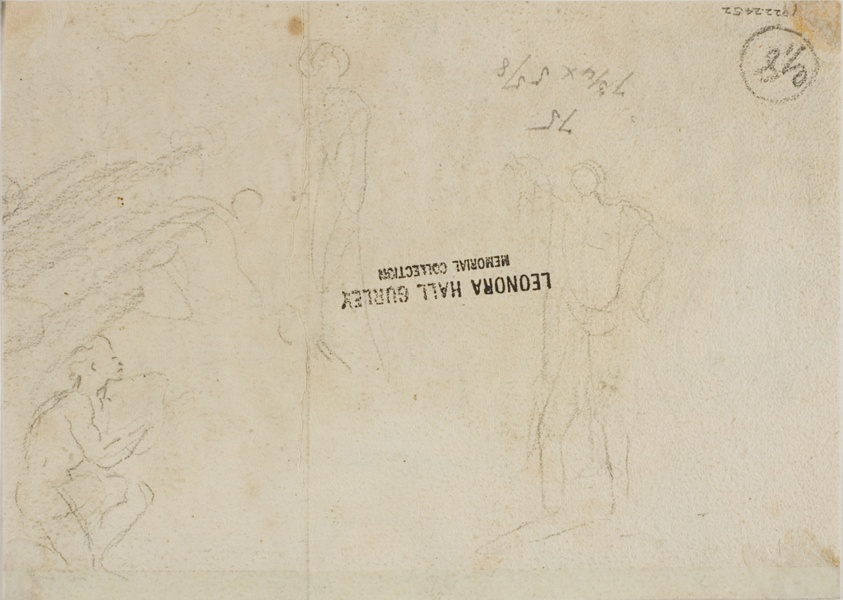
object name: Drawing and Watercolor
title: The Incredulity of Saint Thomas (recto); Sketches of Figures (verso)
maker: Style of Nicolas Poussin (French, 1594-1665)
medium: Pen and brown ink, with brush and brown wash, over graphite and traces of red chalk (recto), and graphite (verso), on cream laid paper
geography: France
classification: pen and ink drawings; drawings (visual works); prints and drawing